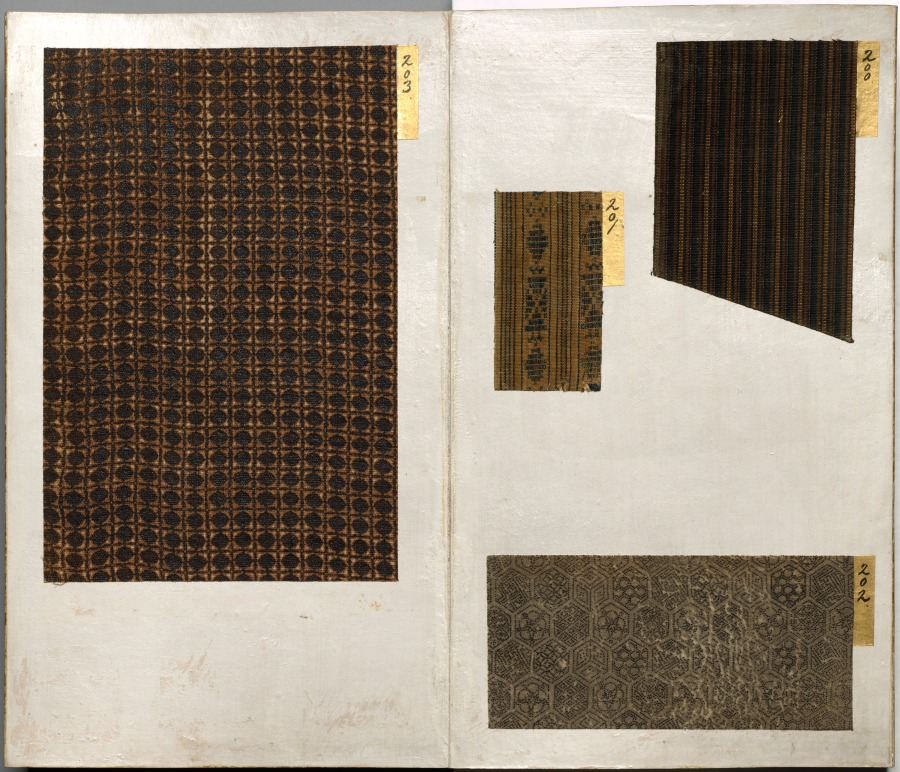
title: Album of Textile Samples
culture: Japan, Edo period (1615–1868)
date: 1600s-1700s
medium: silk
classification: Textile